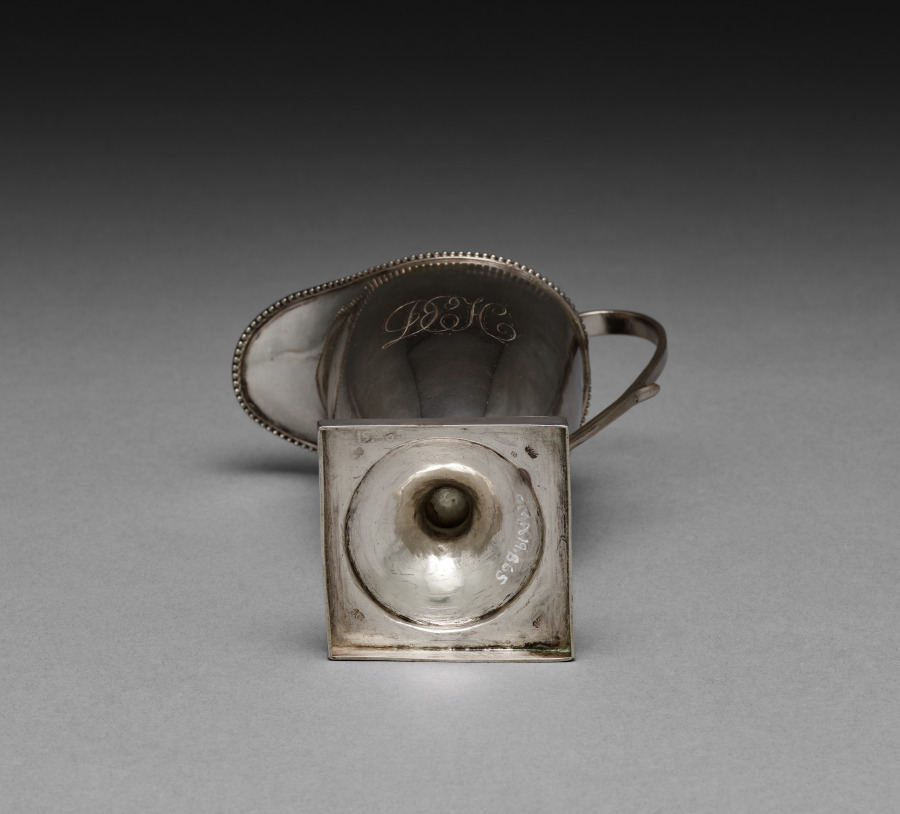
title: Cream Jug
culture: America, Pennsylvania, Philadelphia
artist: attributed to John D. Germon (American)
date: late 1700s–early 1800s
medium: silver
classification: Silver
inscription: engraved in bright-cut script on side of body, to left of handle: DEH.